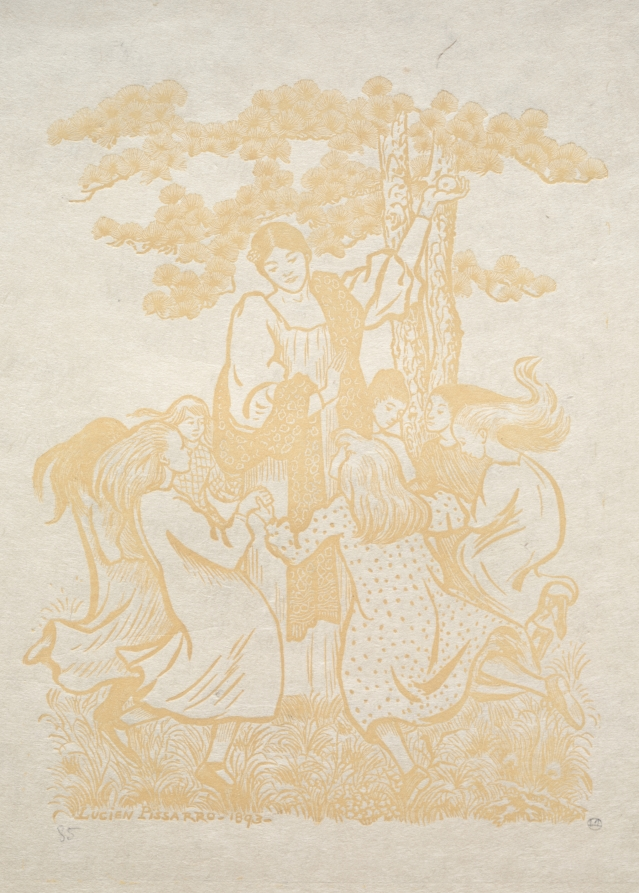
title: Illustration 25: La Ronde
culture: England, 19th century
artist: Lucien Pissarro (British, 1863–1944)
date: 1893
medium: wood engraving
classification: Print